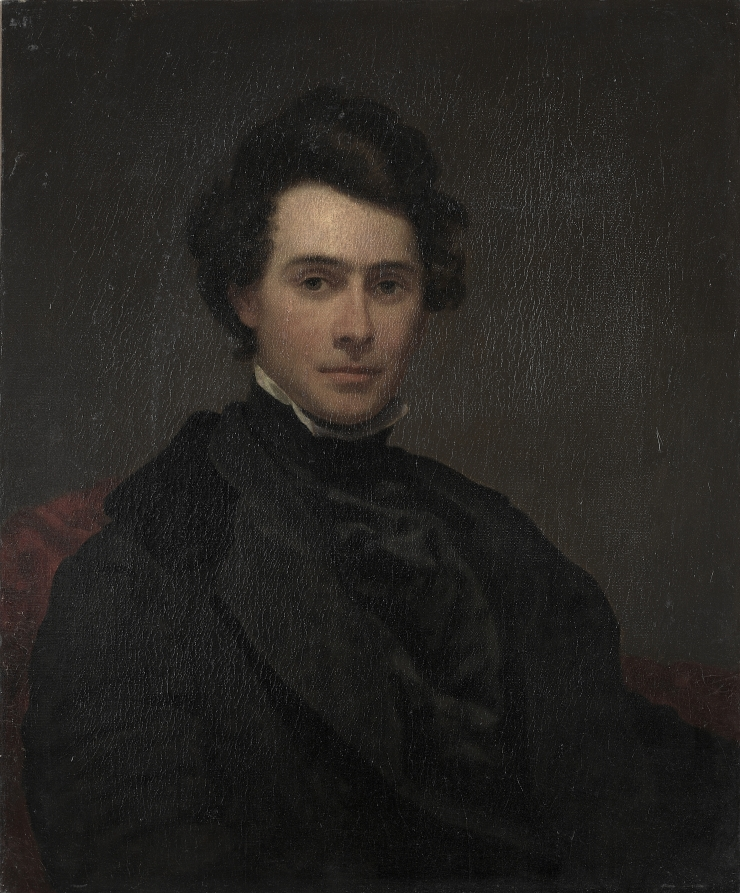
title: Tompkins Matteson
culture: America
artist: Charles Loring Elliott (American, 1812–1868)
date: c. 1840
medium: oil on canvas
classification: Painting